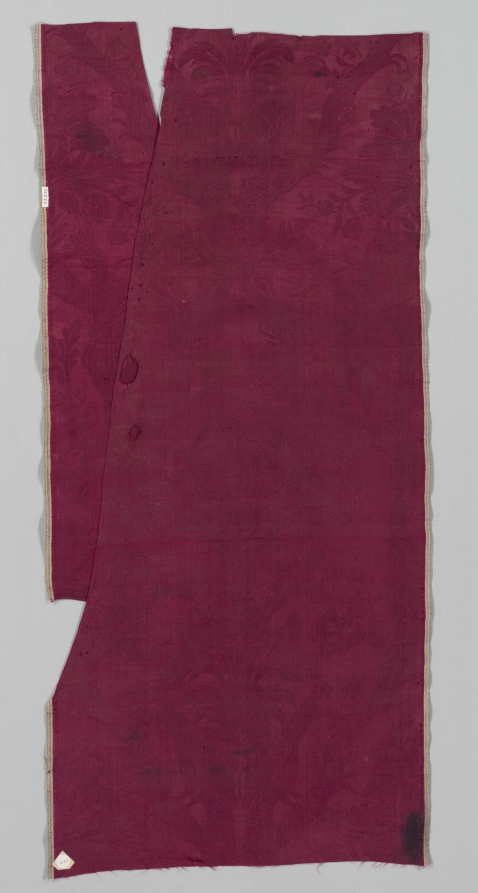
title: Length of Silk Damask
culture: Italy, late 17th century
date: late 1600s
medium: damask, silk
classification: Textile